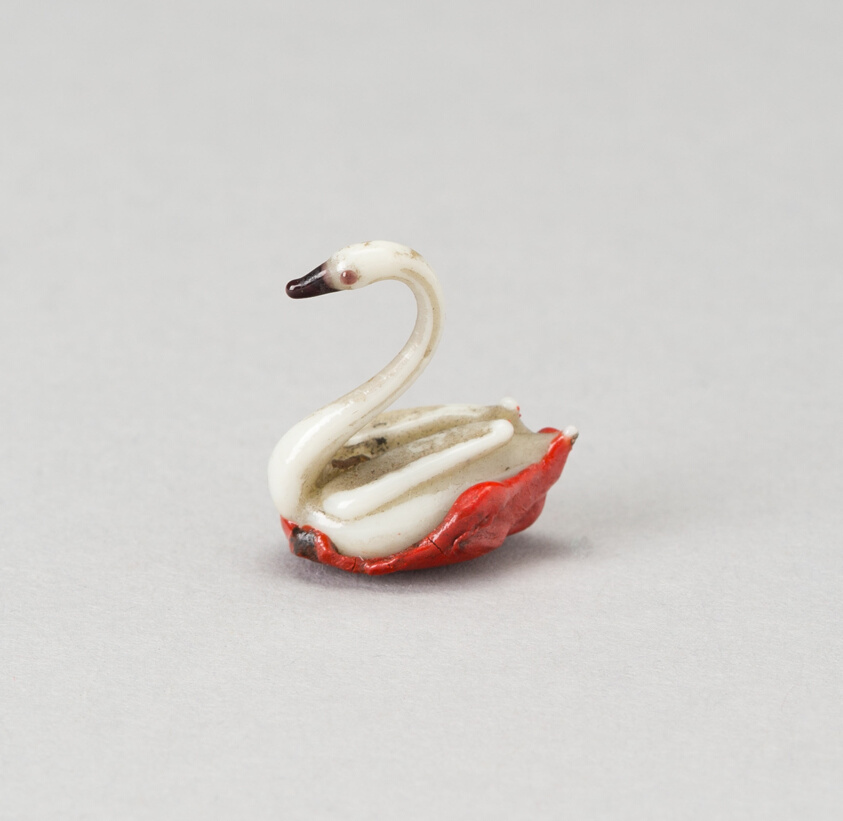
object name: Glass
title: Swan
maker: Nevers, France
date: 18th century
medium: Glass; lampwork (verre de Nevers), metal armature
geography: France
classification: decorative object/ornament; lampwork; glass; european decorative arts